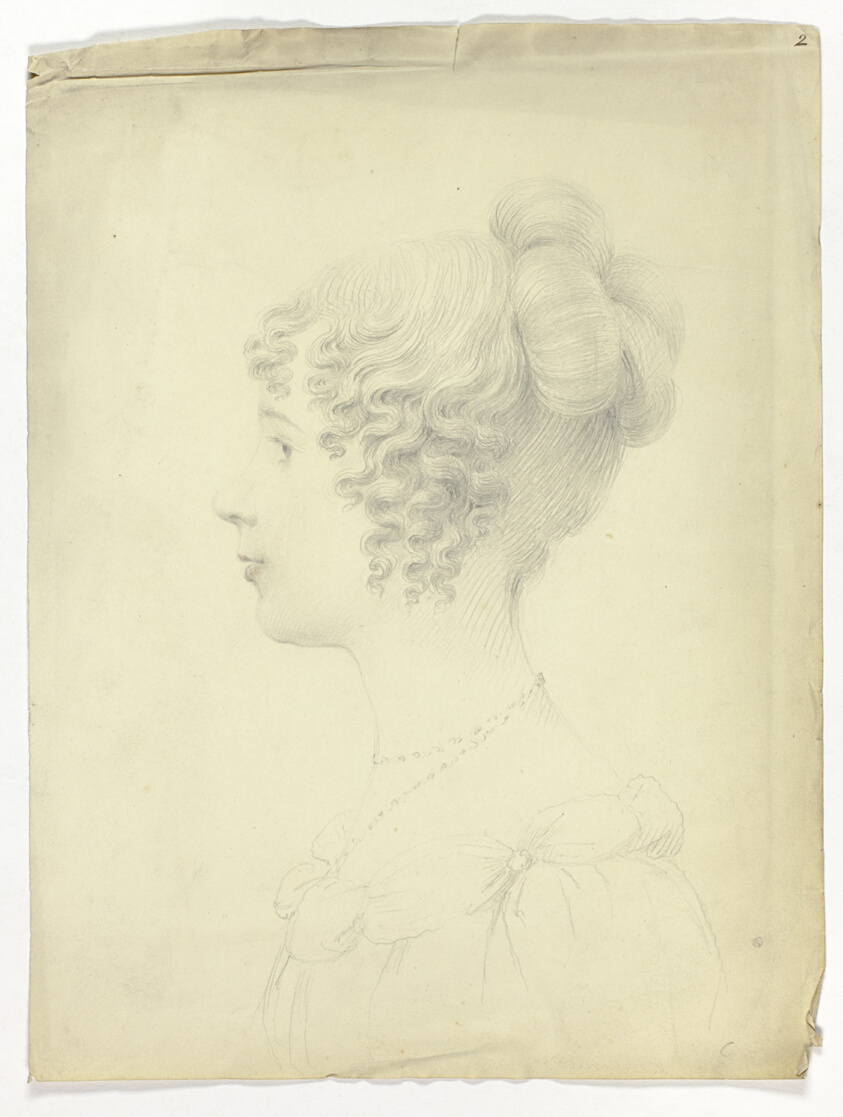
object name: Drawing and Watercolor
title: Profile of Woman Facing Left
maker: Unknown Artist; British, 19th century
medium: Graphite, with red chalk, on cream wove paper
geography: United Kingdom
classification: graphite; drawings (visual works); prints and drawing